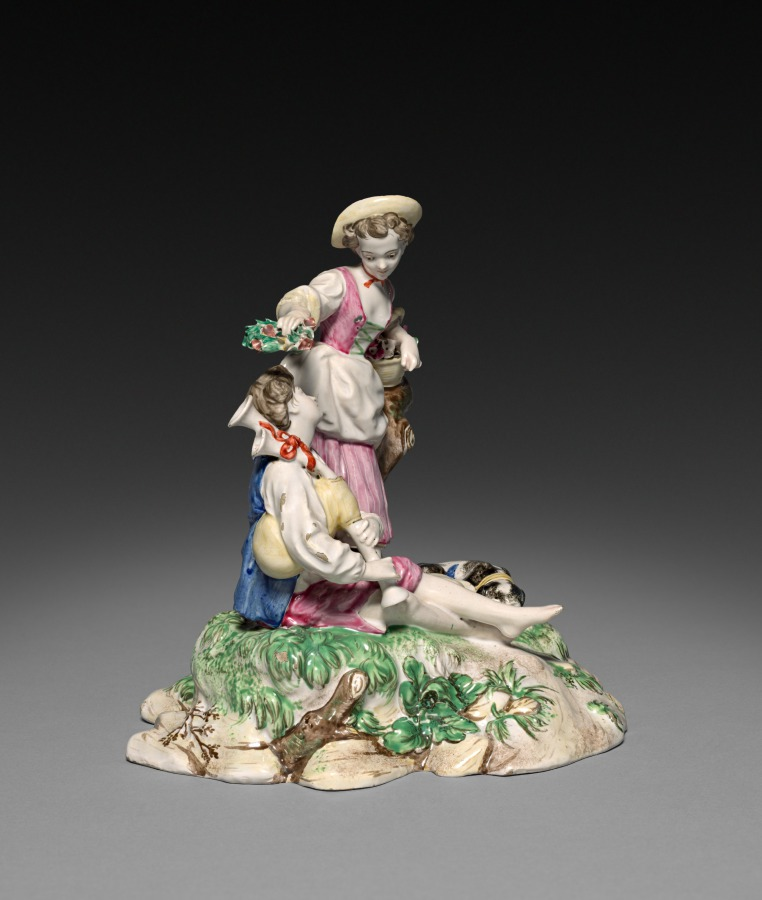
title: Shepherd and Shepherdess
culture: France, 18th century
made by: possibly by Niderviller Factory (French)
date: 1770–1775 ?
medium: faience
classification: Ceramic